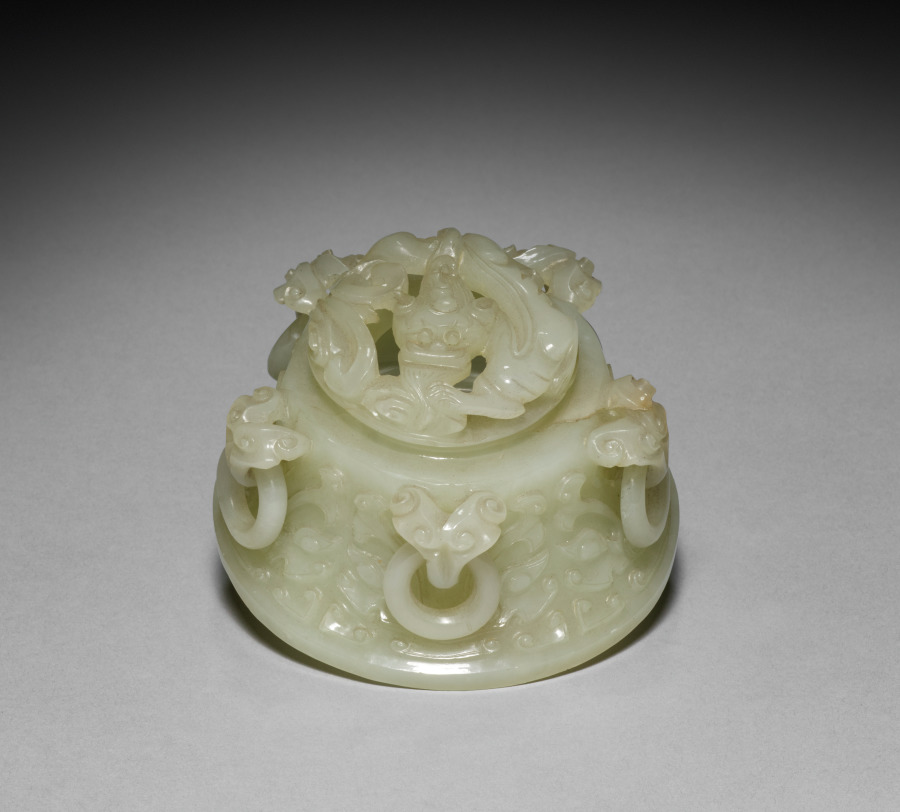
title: Tripod Incense Burner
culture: China, Qing dynasty (1644-1911)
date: 1644–1911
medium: jade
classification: Jade